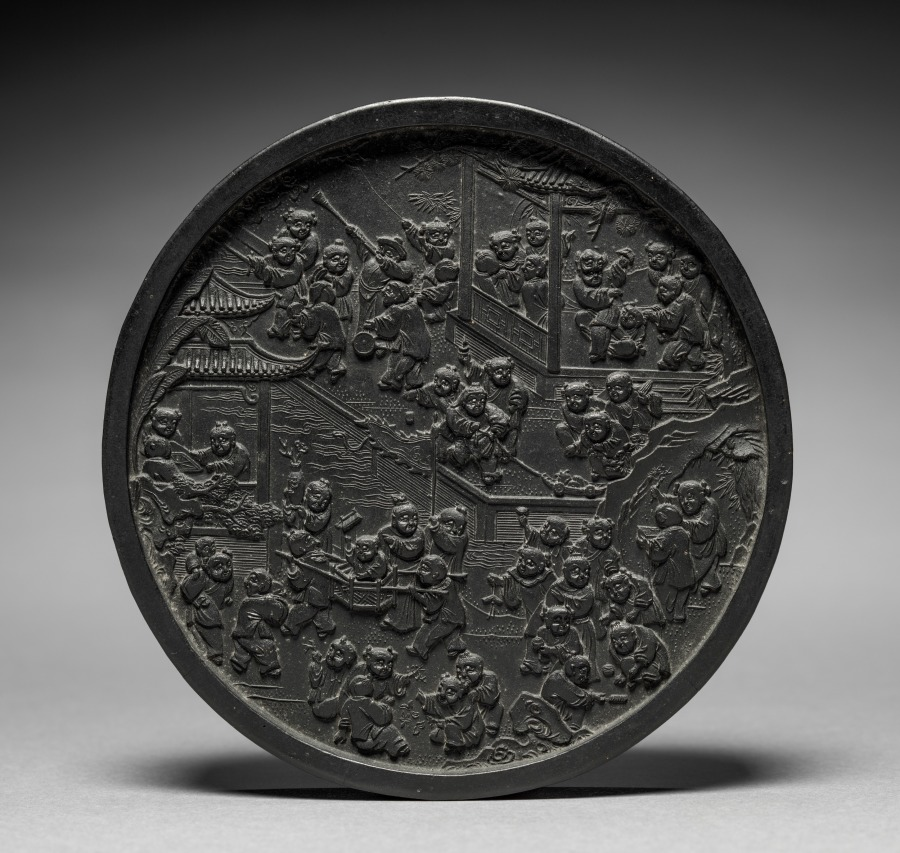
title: Ink Cake with One Hundred Children at Play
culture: China, Ming dynasty (1368–1644)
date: 1368–1644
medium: molded ink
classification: Miscellaneous